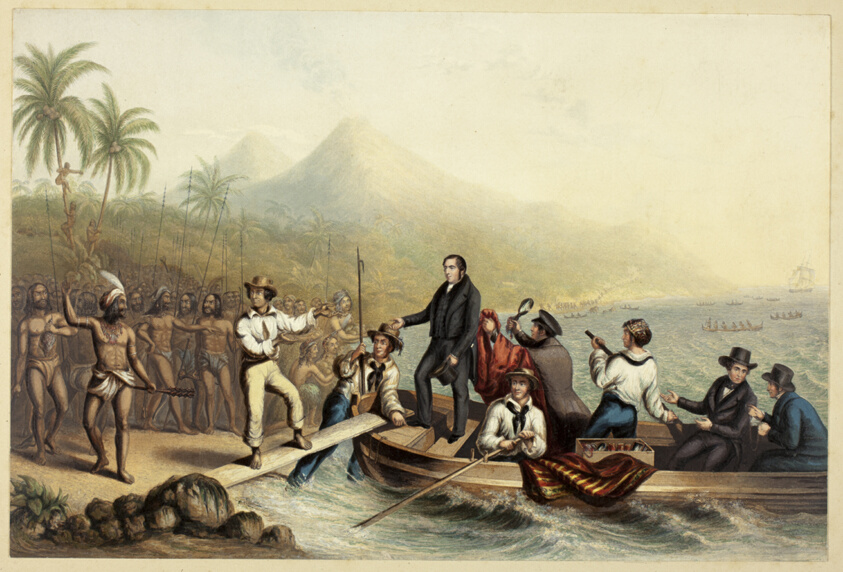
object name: Print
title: The Reception of the Rev. J. Williams, at Tanna in the South Seas, the Day Before He was Massacred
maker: Baxter, George; English, 1804-1867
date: 1841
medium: Steel engraving colored with wooden blocks on cream wove paper, laid down on buff board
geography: England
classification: wood engraving; print; prints and drawing